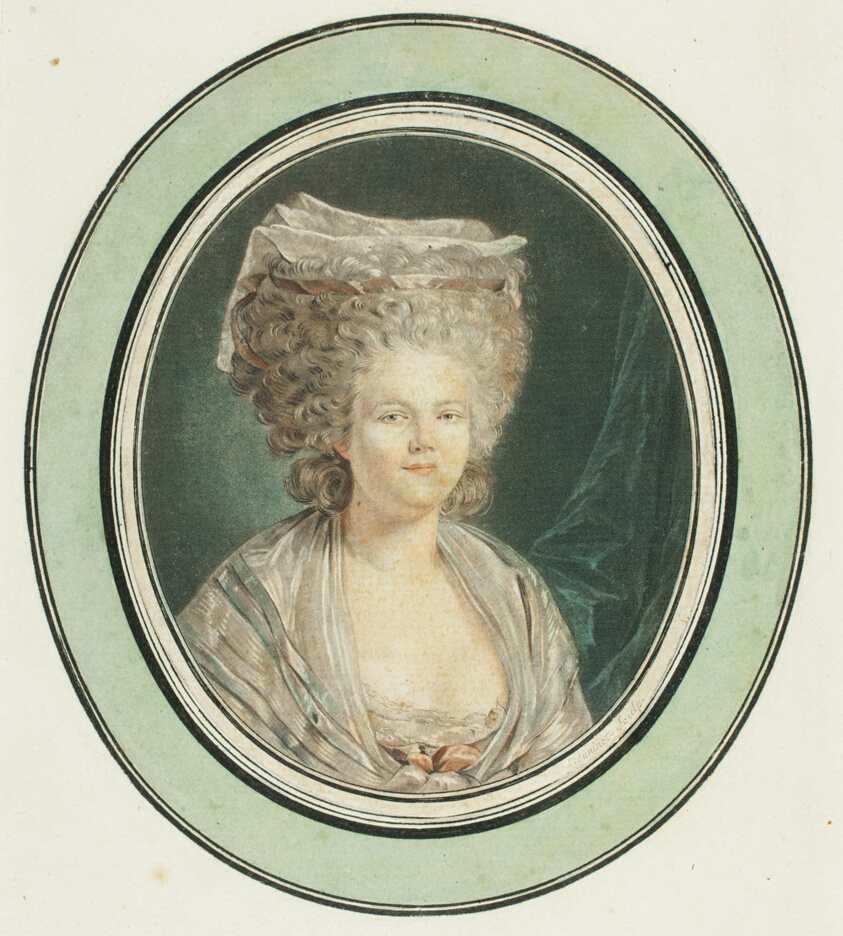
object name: Print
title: Mademoiselle Bertin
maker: Jean-François Janinet; French, 1752-1814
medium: Engraving on paper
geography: France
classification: aquatint; print; prints and drawing